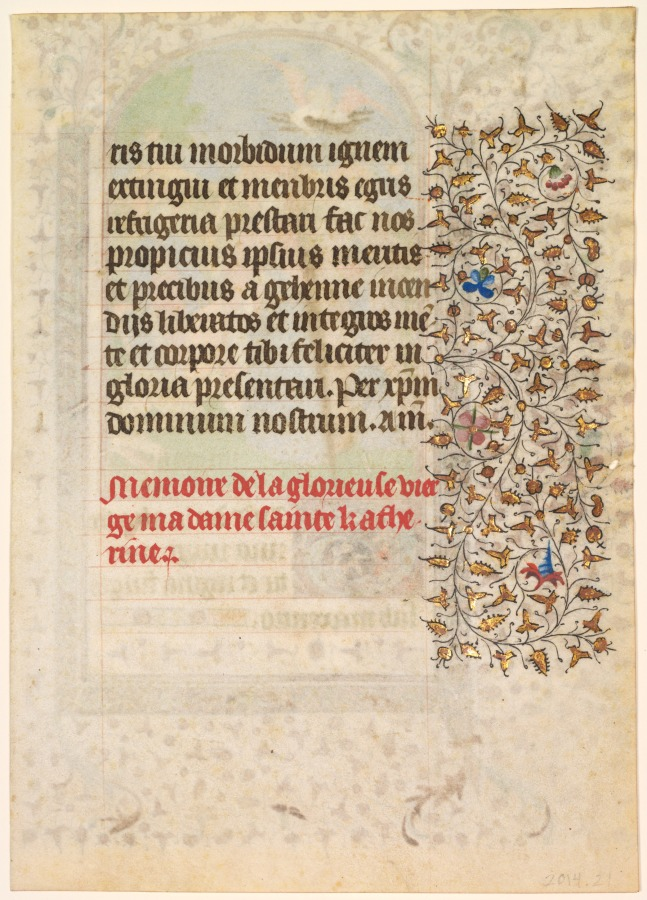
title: Leaf from a Book of Hours: Text (verso)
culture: France, Paris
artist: workshop of Boucicaut Master (French, Paris, active about 1410–25)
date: c. 1415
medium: ink, tempera, silver, and gold on vellum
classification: Manuscript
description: In a book of hours, the suffrages generally appear at the end of the manuscript and consist of prayers to particular saints, often illustrated by miniatures. Saints were the protectors and patrons of medieval people, and countless owners of books of hours must have been consoled by reciting these prayers and readings that contained elements of praise and pleas for intercession. This miniature introduces the suffrage to Saint Catherine of Alexandria, an early virgin martyr of the Christian Church cruelly killed by the Emperor Maxentius (died AD 312). The text begins: Gaude dulcis katherina virgo martr (Rejoice dear Catherine, virgin and martyr). Catherine appears with a palm branch, the symbol of martyrdom, and is flanked by Saints Geneviève and Margaret, two other virgin martyrs of the early church.